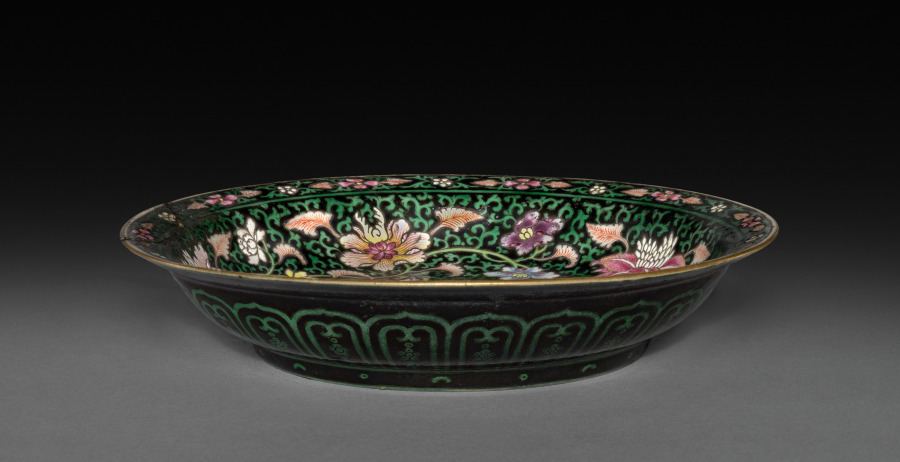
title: Dish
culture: China, Qing dynasty (1644–1911), Qianlong reign (1736–95)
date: 1736–95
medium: porcelain with famille rose overglaze enamel decoration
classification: Ceramic